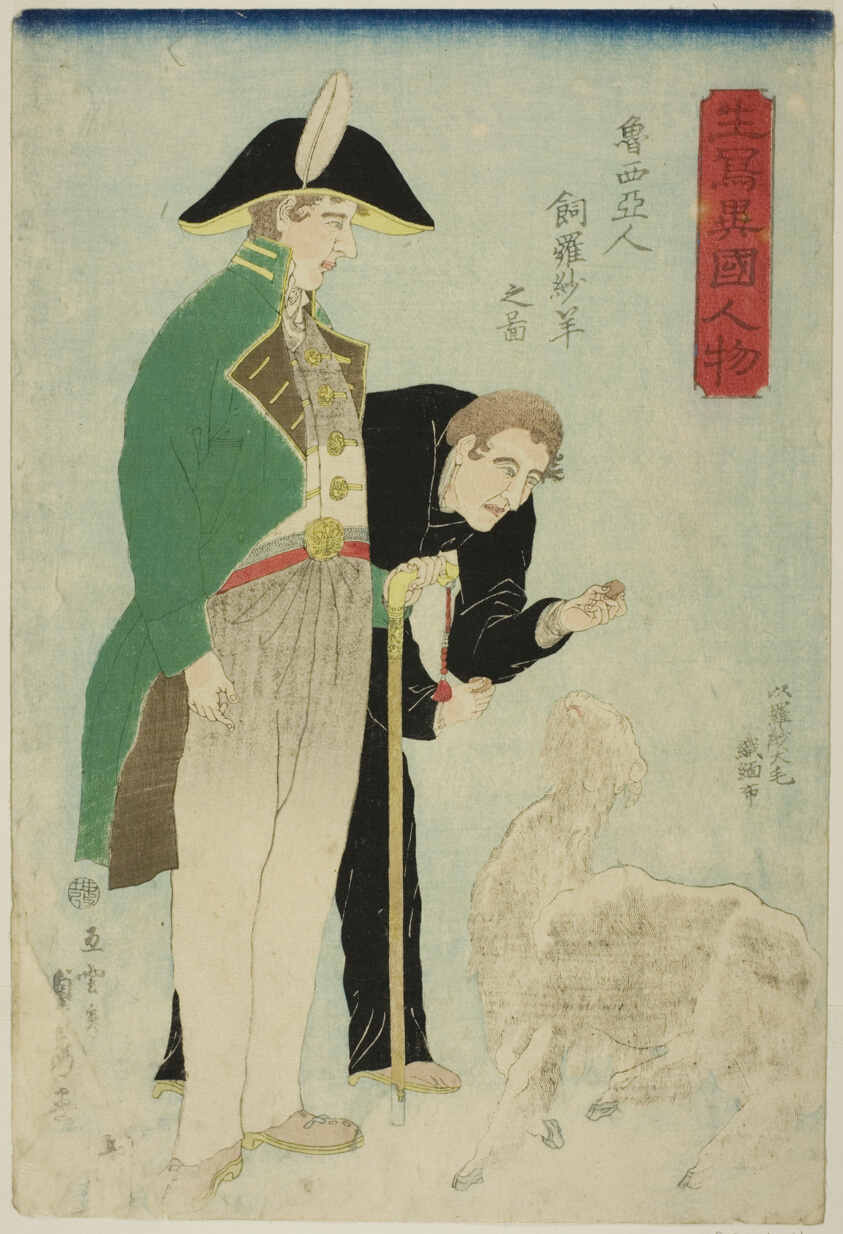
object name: Print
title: Russians raising sheep for wool (Roshiajin rashamen kau no zu), from the series "Foreigners Drawn from Life (Ikiutsushi ikoku jinbutsu)"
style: Japanese (culture or style)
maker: Utagawa Sadahide (Japanese, 1807-1873)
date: 1860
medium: Color woodblock print; oban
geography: Japan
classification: woodblock print; print; asian art